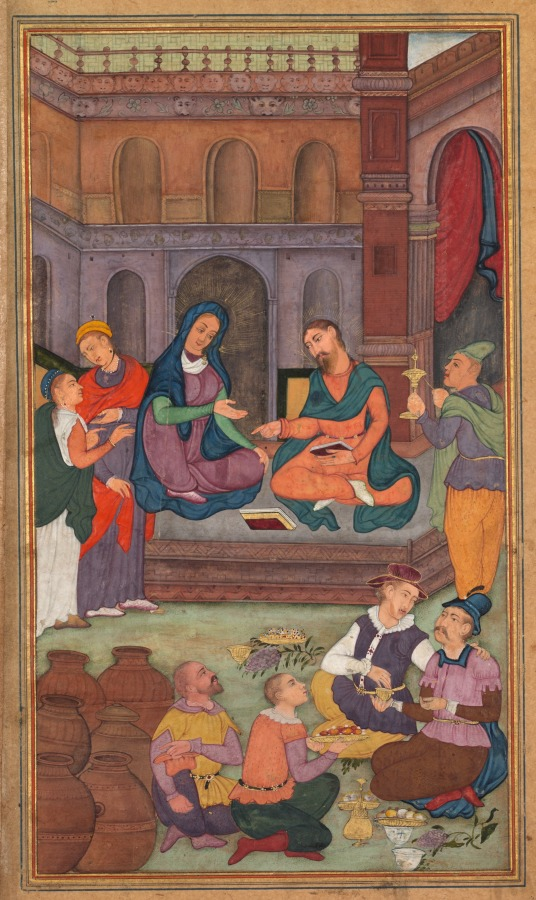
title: The Marriage at Cana (folio 58 verso), from a Mirror of Holiness (Mir’at al-quds) of Father Jerome Xavier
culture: Mughal India, Allahabad, made for Prince Salim (1569–1627)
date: 1602–4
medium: Gum tempera, ink, color, and gold on paper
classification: Manuscript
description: Mary and Jesus sit in places of honor at the wedding of her relatives in Cana in front of a building facade ornamented at the top with charming rows of animal faces. The text specifies that there were six water jars at the gathering, as depicted in the lower left. The wine master in the yellow tunic gestures to the jars, as he admonishes the host for saving the good wine for last. The dumbstruck host, who knew there was no more wine, has discovered that Jesus miraculously transformed the water into wine. The figure wearing the crimson velvet hat with his hand on the host’s shoulder is probably the groom. The miracle inspired him to leave his bride a virgin and follow Christ as the apostle John.